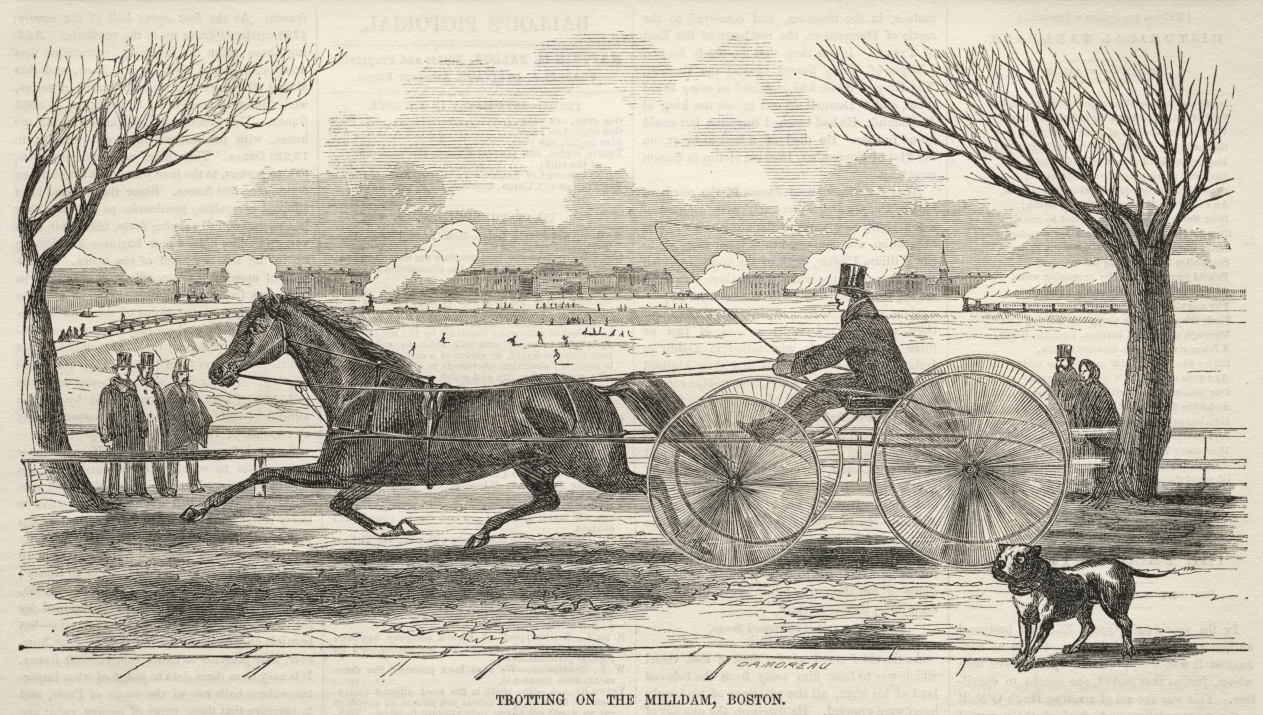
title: Trotting on the Mill Dam, Boston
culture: America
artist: Winslow Homer (American, 1836–1910)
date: 1859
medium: wood engraving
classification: Print